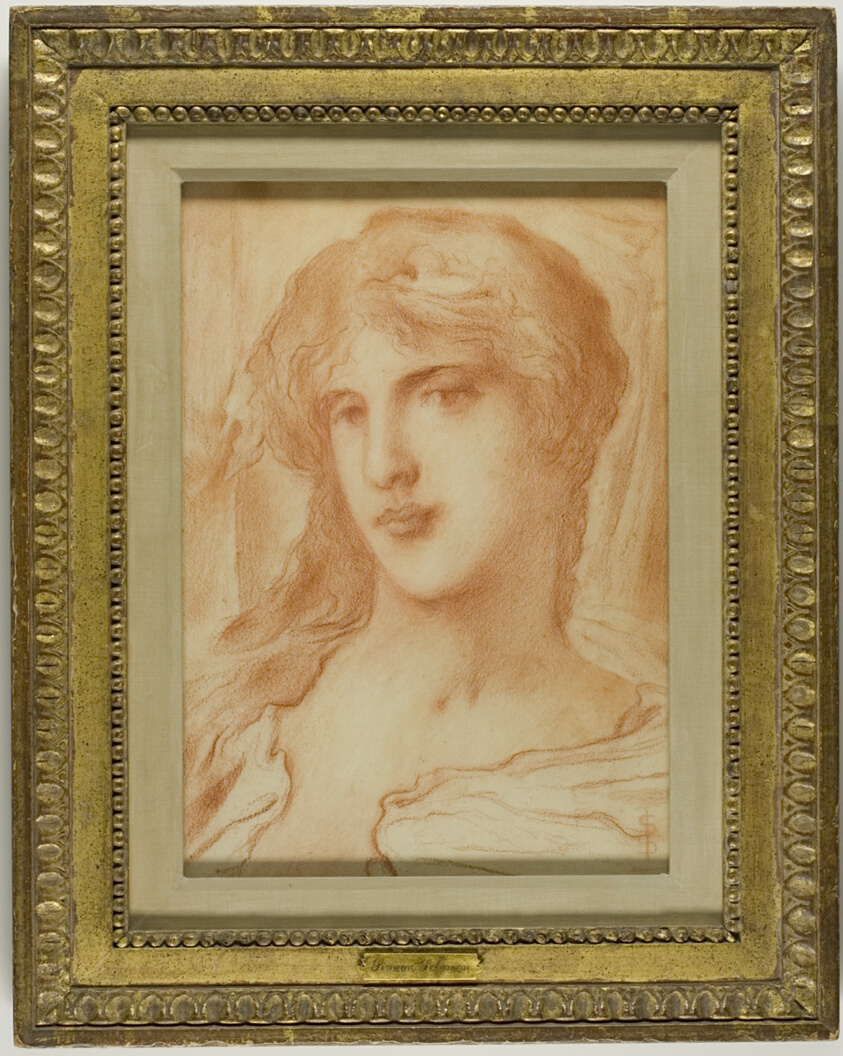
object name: Drawing and Watercolor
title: Head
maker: Simeon Solomon (English, 1840-1905)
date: c. 1880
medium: Red chalk on buff wove paper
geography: England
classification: prints and drawing; drawings (visual works)